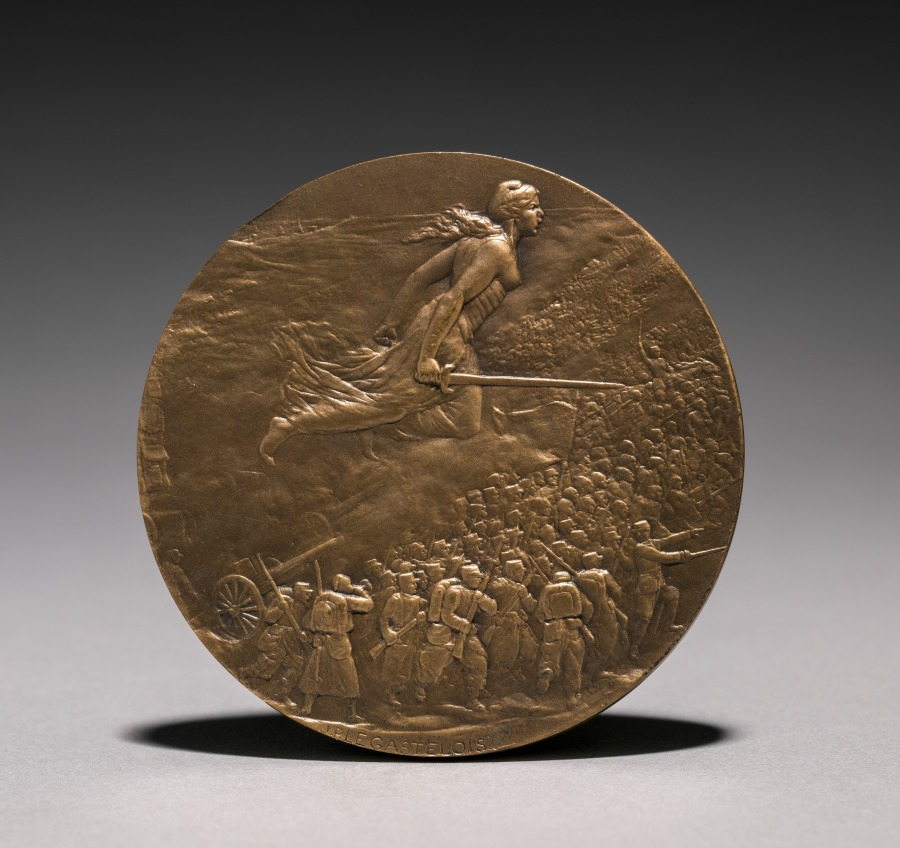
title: Medal (obverse)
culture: France, 20th century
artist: Jules Prosper Legastelois (French, 1855–1931)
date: 1914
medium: bronze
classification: Metalwork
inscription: Bataille de la Marne, September, 1914.